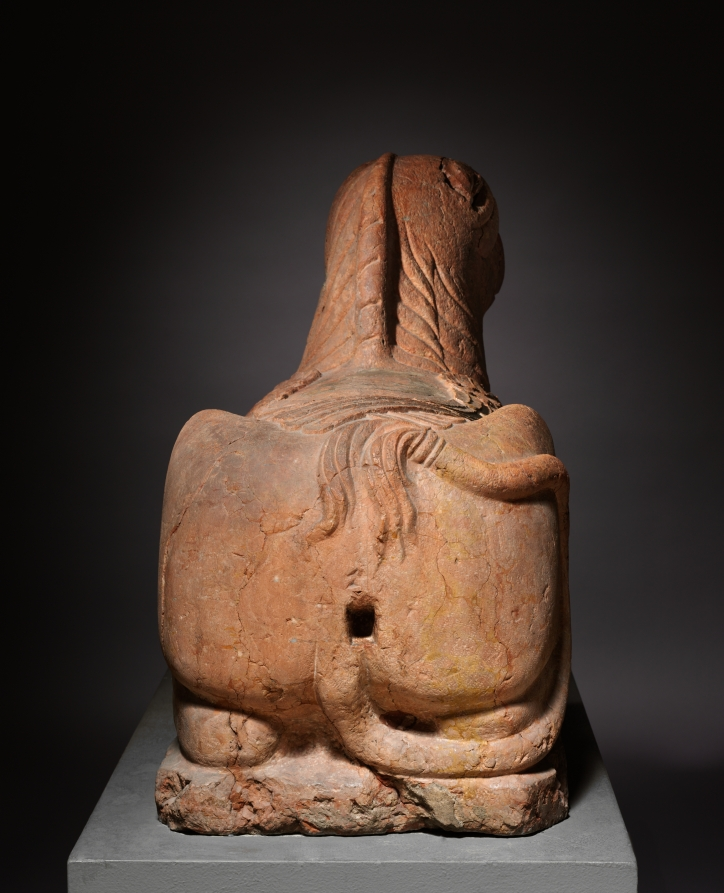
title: Guardian Griffin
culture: Northern Italy, Emilia, 12th century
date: 1150–1175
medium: pink limestone (called "Verona Marble")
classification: Sculpture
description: Griffins are fabled creatures that have the characteristics of an eagle and a lion--combining watchfulness and courage. In Christian art, the dual nature of the griffin was often used to signify that of Christ himself: divine (bird) and human (animal). Griffins were often used as guardian figures in church sculpture and were placed in portals and choir screens. The creatures seen here, with their inward-turning heads, were certainly used for such a purpose. When viewed from the front, one griffin may be seen protecting the figure of a knight between its paws, while the other griffin guards a calf. Their original function was probably to support the columns of a porch in front of a church doorway.